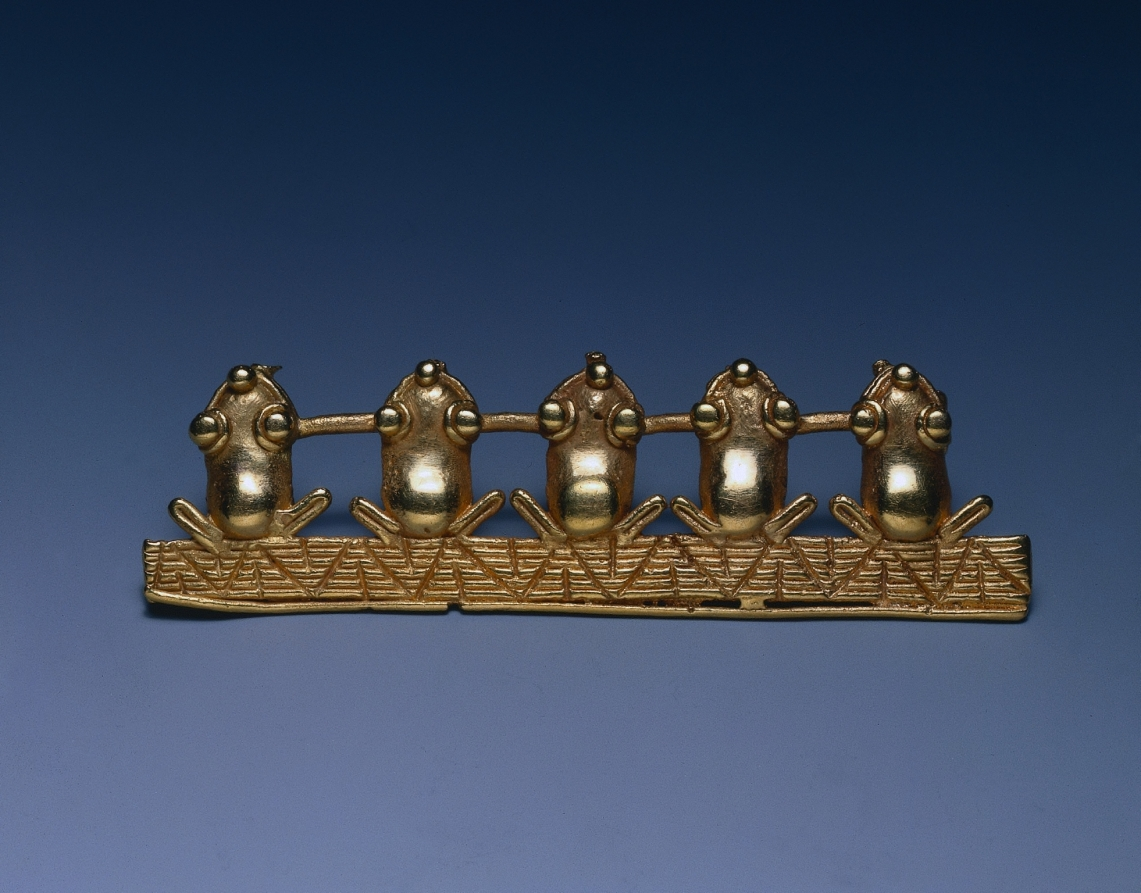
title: Frog Pendant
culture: Panama, Veraguas-Chiriquí style, 11th-16th century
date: c. 1000–1550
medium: cast gold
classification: Metalwork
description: In general, frogs and toads symbolize life-giving water and the green growth it promotes. More surprising is their mythical role as keepers or donors of fire, an association perhaps enhanced by the bright colors that many frogs "flash" when startled, a form of protection. Brightly colored frogs, including those with golden tones, also produce very poisonous toxins, which in part led to a final connection with the underworld and death.